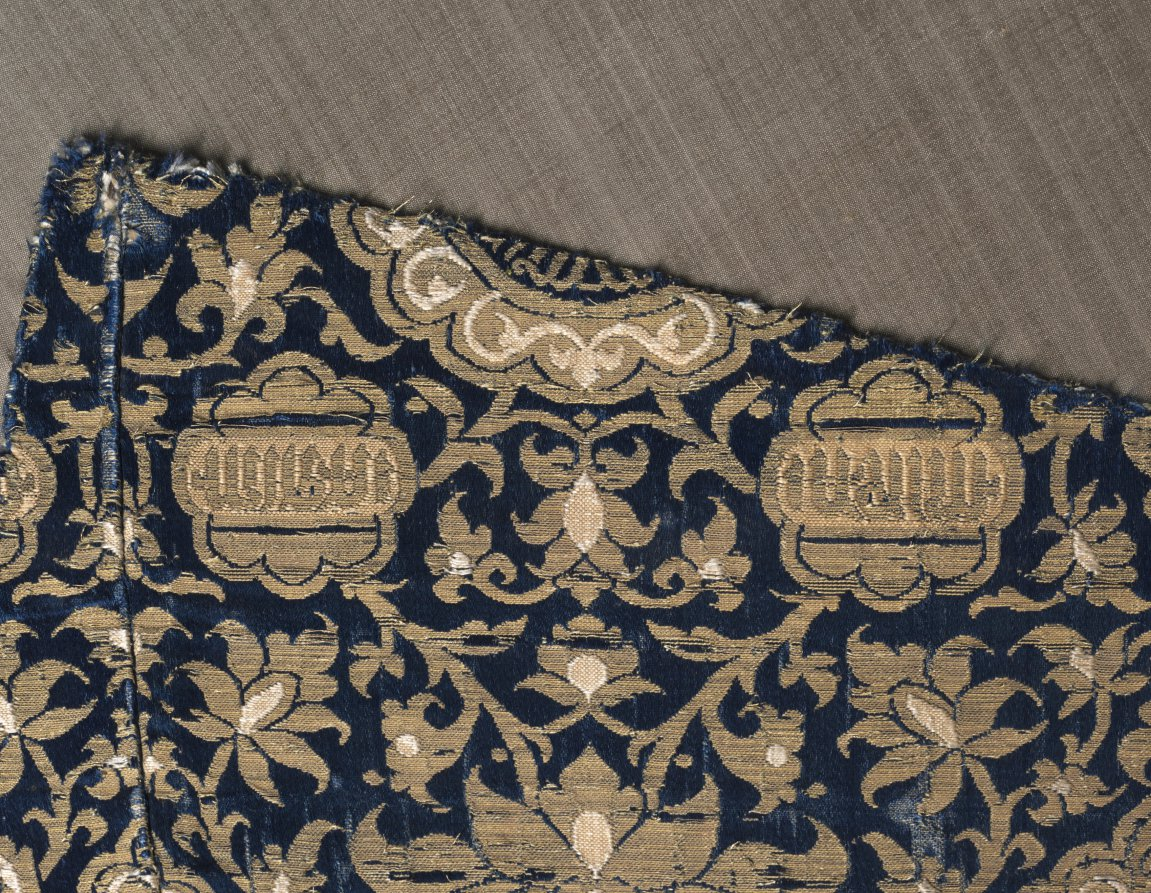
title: Mantle for a Statue of the Virgin with Lotus Blossoms and Medallions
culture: Egypt and Spain; Egypt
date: c. 1430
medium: Silk and gilt-metal thread: lampas weave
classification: Textile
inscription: Glory to our master, the sultan, the king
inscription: The sultan, the king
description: This costly royal silk with extensive gold thread was woven in Egypt and gifted or exported to Spain, where it was pieced into this mantle for a statue of the Virgin, probably to be worn during festivals and processions. The sturdy silk brocade foundation cloth was also woven with a lighter weight silk damask with a repeating mirror image. Therefore, the Arabic inscription in the medallions reads both forward and backward: Glory to our master, the sultan, the king. The inscribed lobed roundels say The sultan, the king.